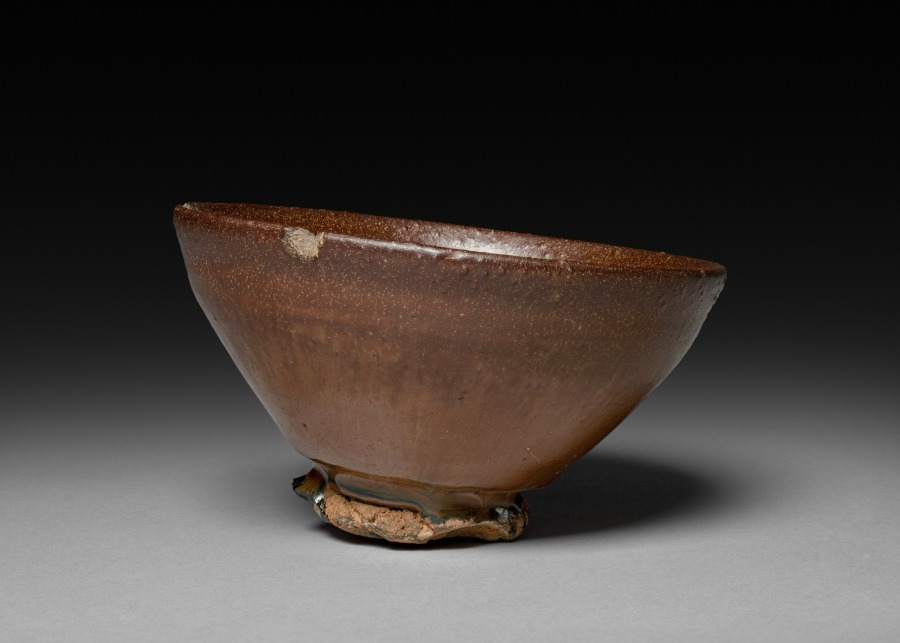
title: Tea Bowl: Jian ware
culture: China, near Shui ch'i, Song dynasty (960-1279)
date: 960–1279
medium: stoneware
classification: Ceramic